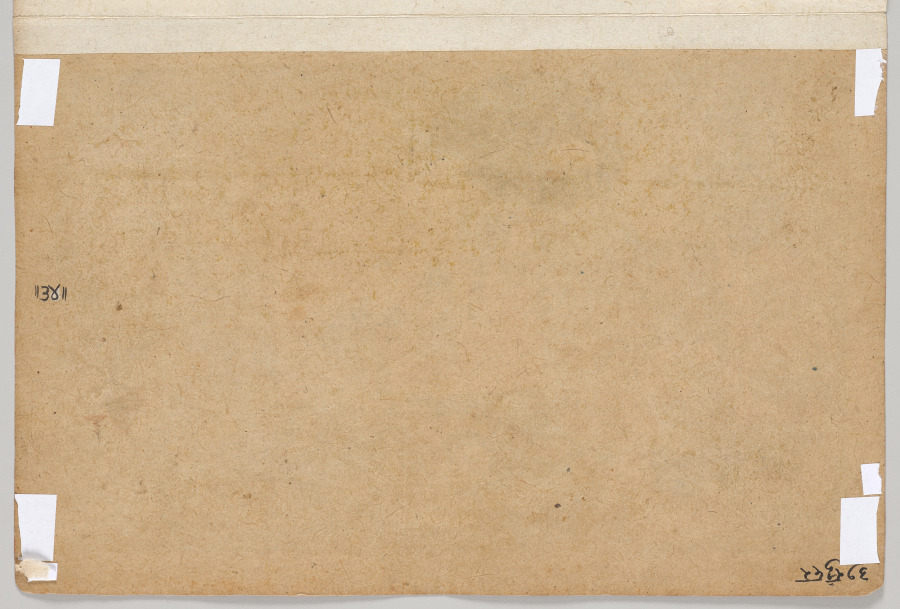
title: Hanuman spies Sita in the Ashoka Grove, from the “Shangri” Ramayana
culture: Northern India, Pahari kingdoms, Himachal Pradesh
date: c. 1700–25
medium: Gum tempera and ink on paper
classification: Painting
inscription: Verso: in Devanagari 31 Suṃdara; inverted: ||34||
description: After her abduction, Sita is imprisoned in a garden on the island of Lanka. Female guards appointed by her captor, the demon Ravana, surround her and jeer as she crouches on a step. The monkey in the tree above her is the hero Hanuman, a loyal friend to her husband Rama. He shrank to disguise himself and gives her a message: now that he has found her, he will bring Rama and their armies to rescue her.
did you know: The female guards have human bodies and fanciful animal heads.